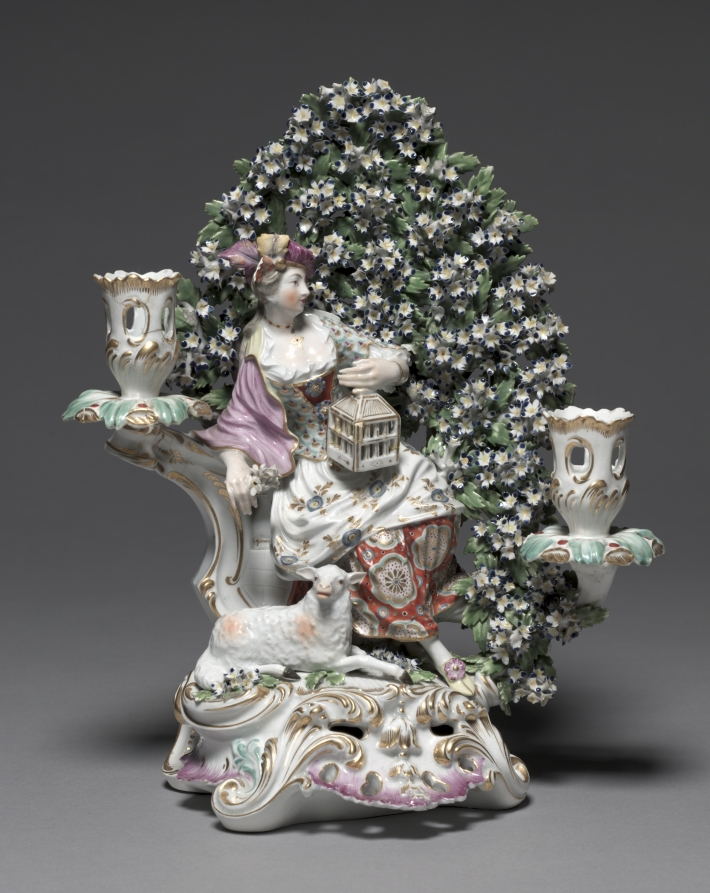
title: Candelabrum Depicting an Allegorical Figure of Matrimony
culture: England, London, Chelsea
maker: Derby Porcelain Factory (Chelsea-Derby Period, 1770–84)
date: c. 1775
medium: soft-paste porcelain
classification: Ceramic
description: This allegorical figure depicts a shepherdess dressed in richly patterned garments. Here the figure (Matrimony) holds a birdcage in one hand and subtly directs the viewer’s gaze toward the sheep resting nearby with the other. An accompanying figure, a shepherd (Liberty) is joined by a dog and a bird that perches on his outstretched arm.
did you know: The canopy of foliage surrounding these figures was inspired by the arbors popular in theatrical stage designs during the mid-1700s.